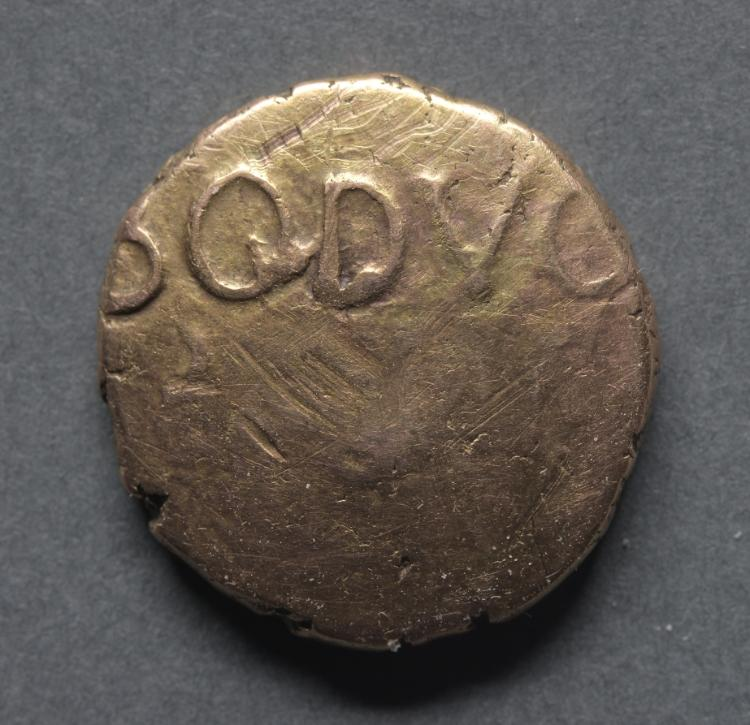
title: Stater: BODVOC on plain field (obverse)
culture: England, Dobunni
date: 10 BCE–20 CE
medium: gold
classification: Coins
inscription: BODVO[C].